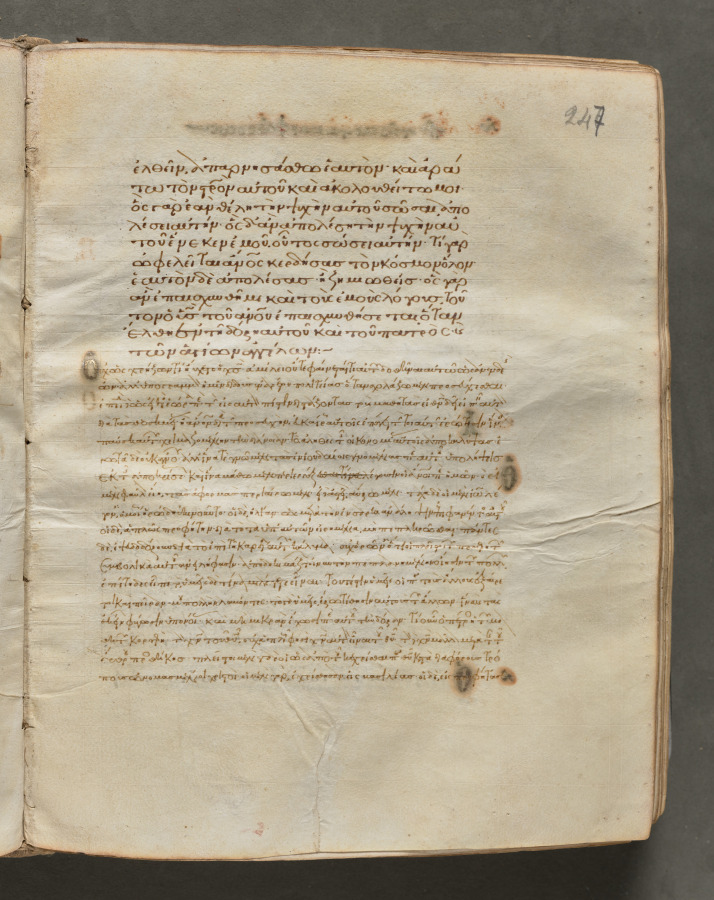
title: Text, folio 247 (recto), from a Gospel Book with Commentaries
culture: Byzantium, Constantinople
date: c. 1000–1100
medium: ink, tempera, and gold on vellum; leather binding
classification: Bound Volume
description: Each of the four gospels in this book opens on a page with brilliantly illuminated borders depicting the author of the text as well as birds—principally peacocks, symbols of the immortality of the soul—and fountains, representing the fountain of life and the salvation of the soul. This volume consists of 428 leaves with texts in Greek. Its level of sophistication suggests that it was probably written and decorated in a monastery in Constantinople.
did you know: Gospel books were carried in procession through Byzantine churches.